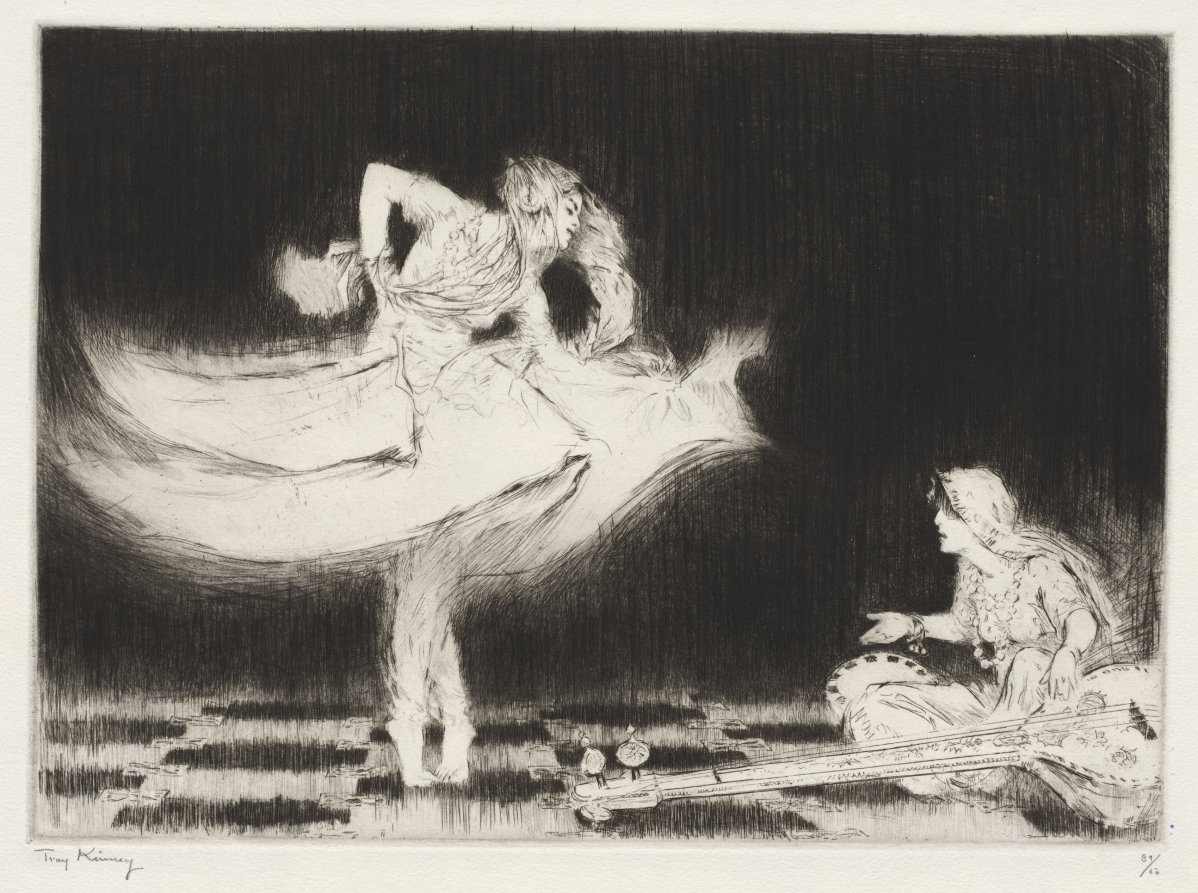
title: Roshanara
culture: America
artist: Troy Kinney (American, 1871–1938)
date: c. 1918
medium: etching and drypoint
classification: Print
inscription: Signed in pencil on bottom left beneath image: Troy Kinney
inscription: Marked in pencil on bottom right beneath image: 39/50